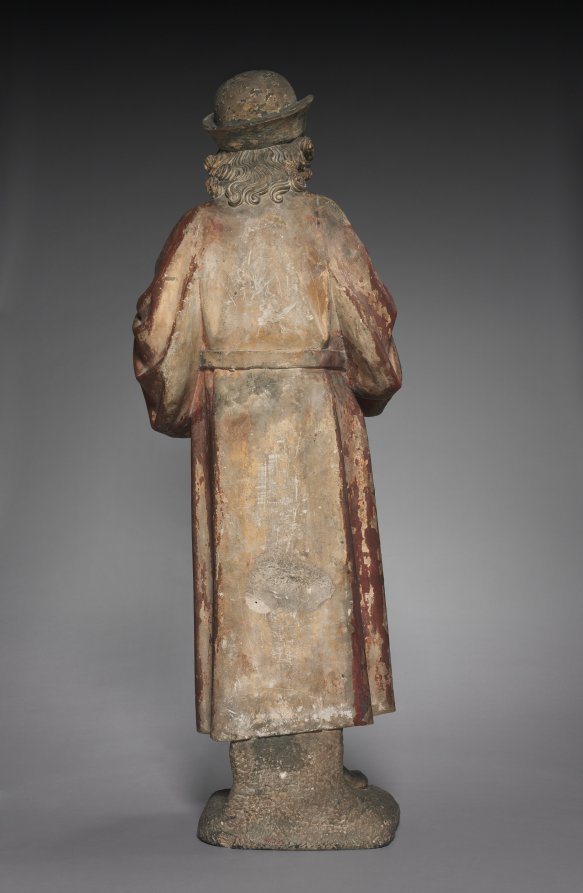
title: Magus from an Adoration Group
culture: France, possibly Champagne, 15th century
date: c. 1460–1475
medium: polychromed limestone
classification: Sculpture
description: This sculpture represents one of the three Magi or kings who witnessed the birth of Jesus. The Magi are identified as Caspar, Melchior, and Balthazar and are typically shown in art bearing their gifts of gold, frankincense, and myrrh. Joseph is often present in these scenes as are shepherds.The single figure shown here was originally part of a sculptural group with many figures. He is shown holding an ornate receptacle with lid. Other figures from the group are not known to have survived, and which Magus the sculpture was intended to represent cannot be clearly established.